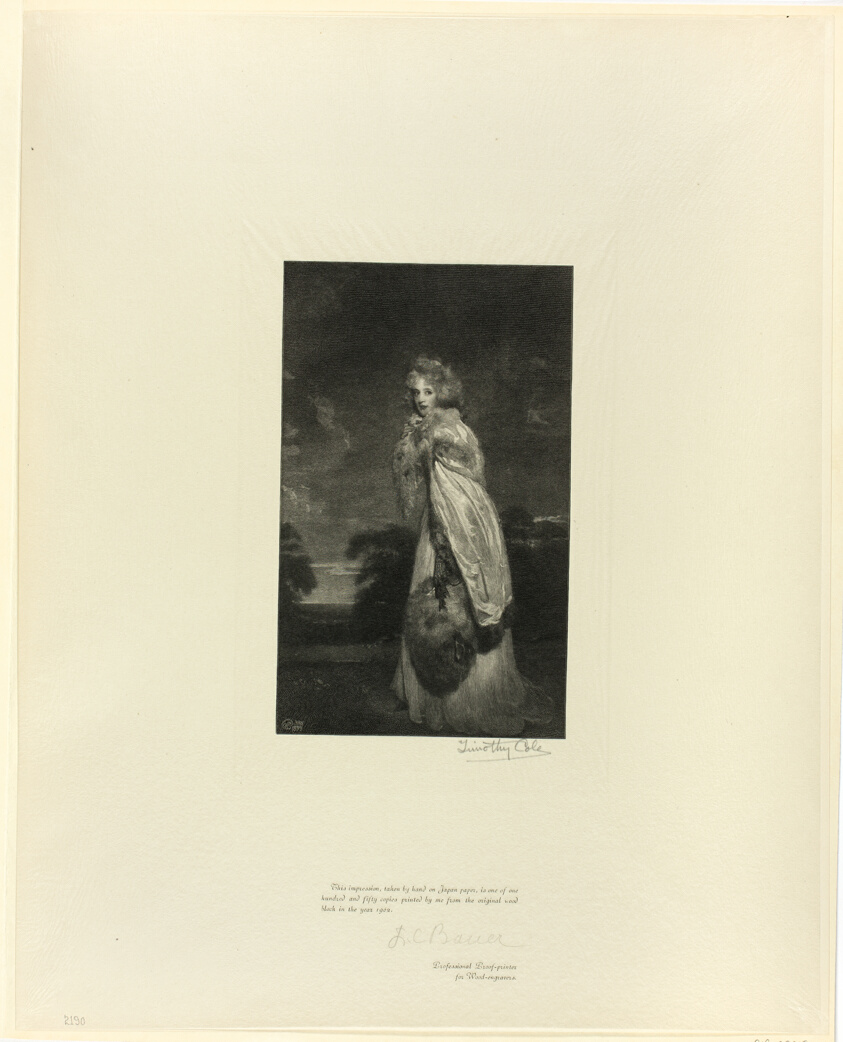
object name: Print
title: Lady Derby (Miss Farren), from Old English Masters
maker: Timothy Cole (American, born England, 1852-1931); after Sir Thomas Lawrence (English, 1769-1830)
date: 1899, printed 1902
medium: Wood engraving on chine paper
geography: United States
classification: wood engraving; print; prints and drawing